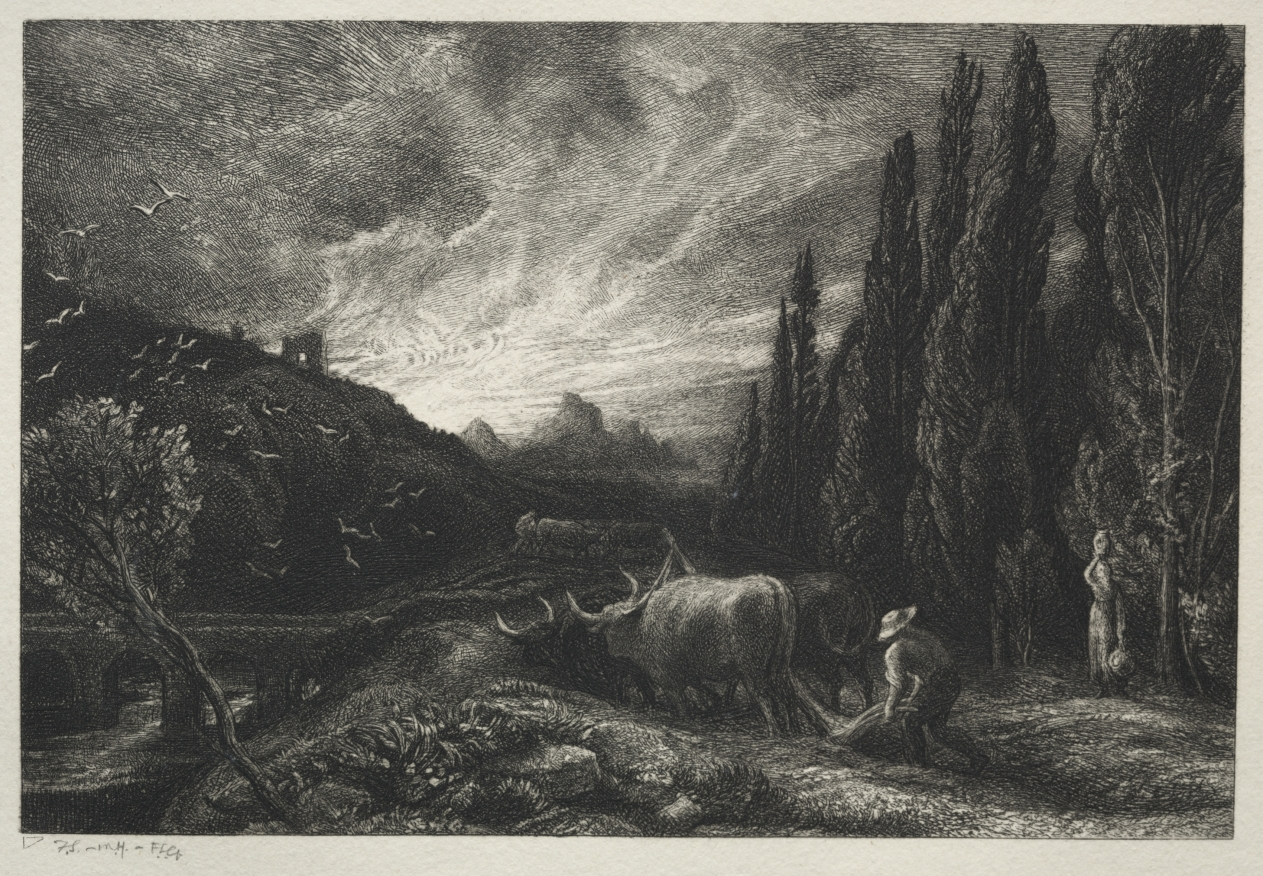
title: The Early Plowman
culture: England, 19th century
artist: Samuel Palmer (British, 1805–1881)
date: before 1861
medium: etching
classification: Print